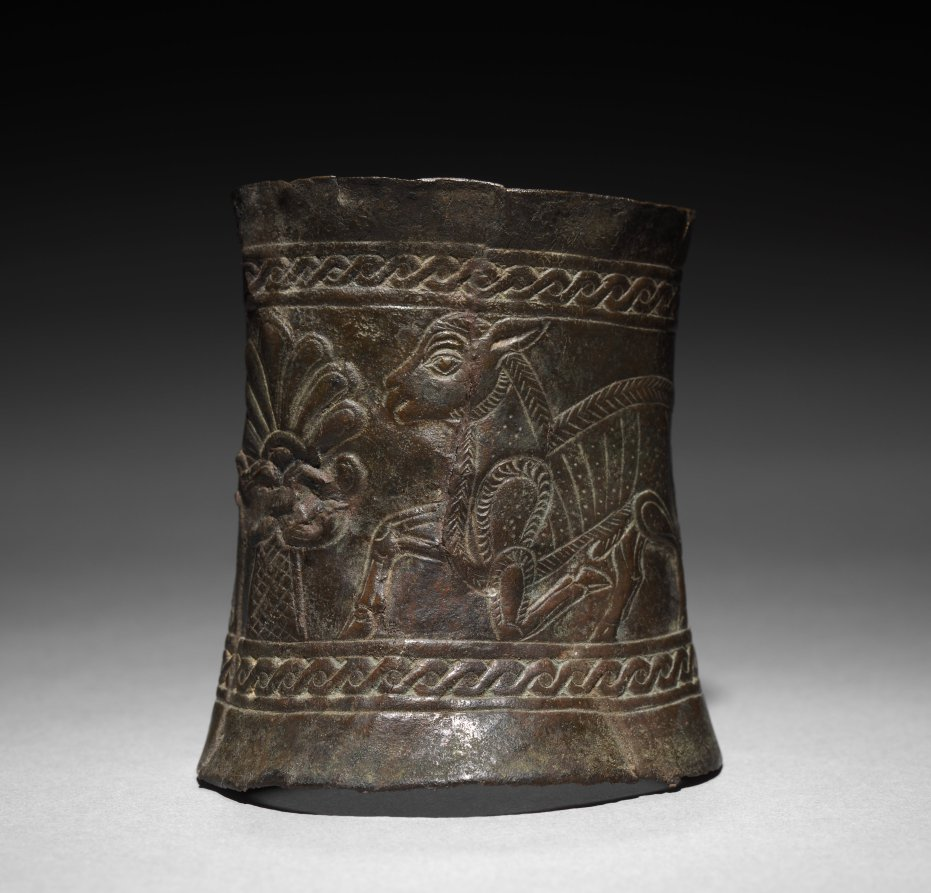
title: Decorated Cylinder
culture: Iran, Mannaean, Ziwiye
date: c. 1000–800 BCE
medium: bronze, repoussé and incised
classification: Metalwork